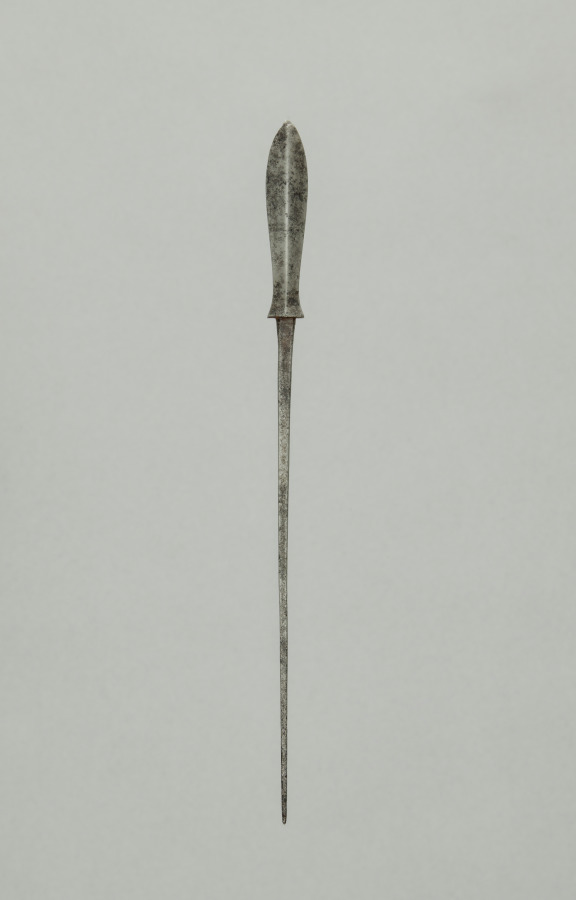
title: Arrow Point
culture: Japan, Edo period (1615–1868)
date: 1700s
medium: steel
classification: Arms and Armor